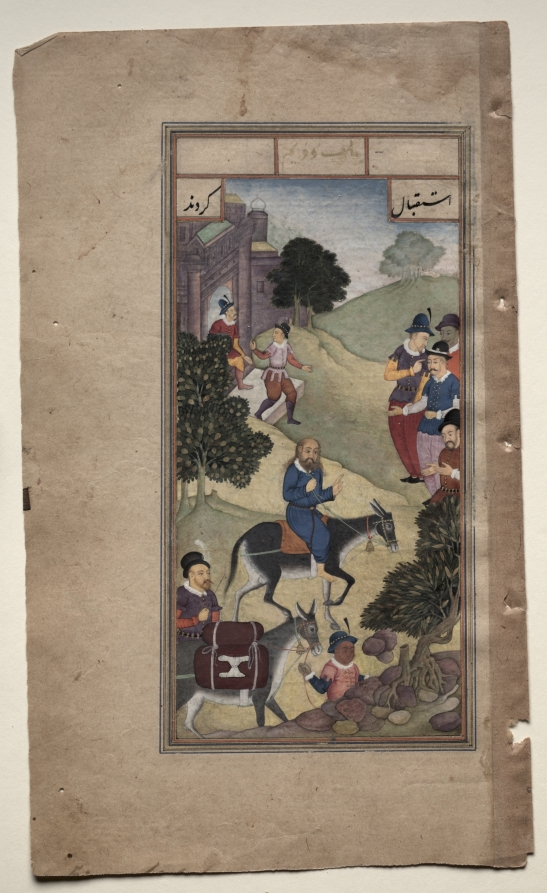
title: The Entry into Jerusalem (folio 156 recto), from a Mirror of Holiness (Mir’at al-quds) of Father Jerome Xavier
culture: Mughal India, Allahabad, made for Prince Salim (1569–1627)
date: 1602–4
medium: Gum tempera, ink, color, and gold on paper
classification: Manuscript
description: Jesus rides astride a female donkey, as specified in the text, and he greets a group of four men, two of whom seem to welcome him with hands extended. He follows the road to the gates of Jerusalem, which appear in the upper left corner. Father Jerome devoted only three short lines to this episode, so perhaps its selection for illustration is connected to an old and popular Islamic saying: “If Jesus’s donkey is taken to Mecca, when it comes back it will still be a donkey.”